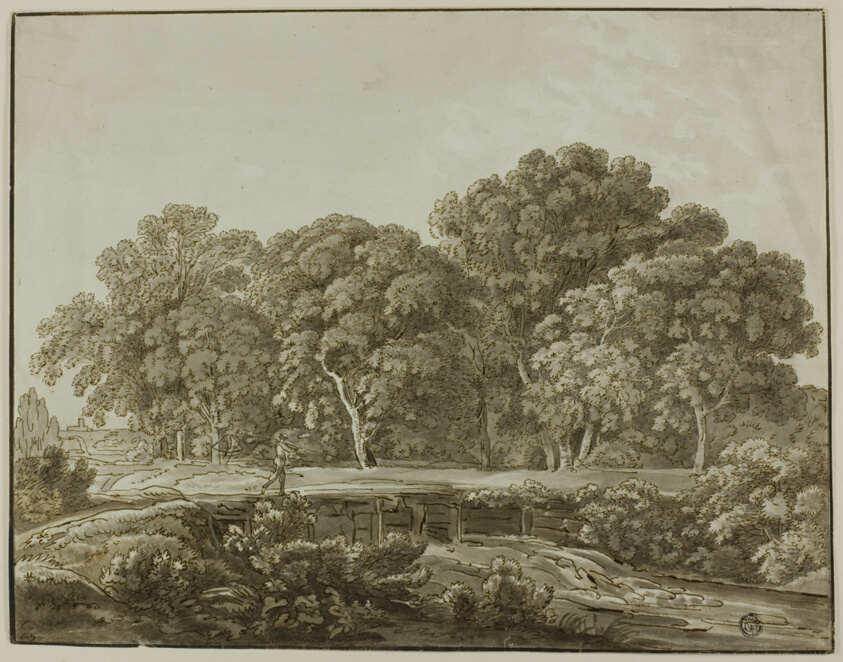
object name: Drawing and Watercolor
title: Landscape with Figure Crossing Bridge over Stream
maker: Thomas Sandby (English, 1721-1798); or Paul Sandby (English, 1731-1809)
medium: Pen and brown ink with brush and brown wash, over traces of graphite, on gray laid paper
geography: England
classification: pen and ink drawings; drawings (visual works); prints and drawing